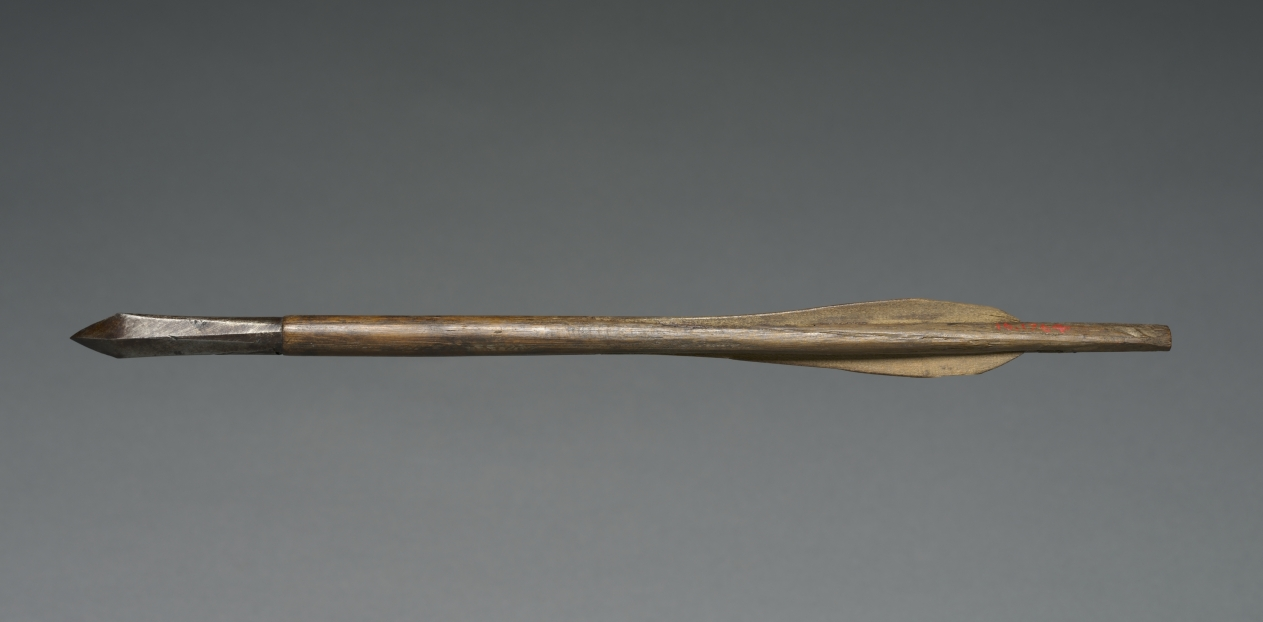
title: Crossbow Bolt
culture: Germany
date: 1500s–1600s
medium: wood, leather, steel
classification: Arms and Armor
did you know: Bolts with leather feathering were used mainly in the Tyrolean area, which includes northern Italy and western Austria.